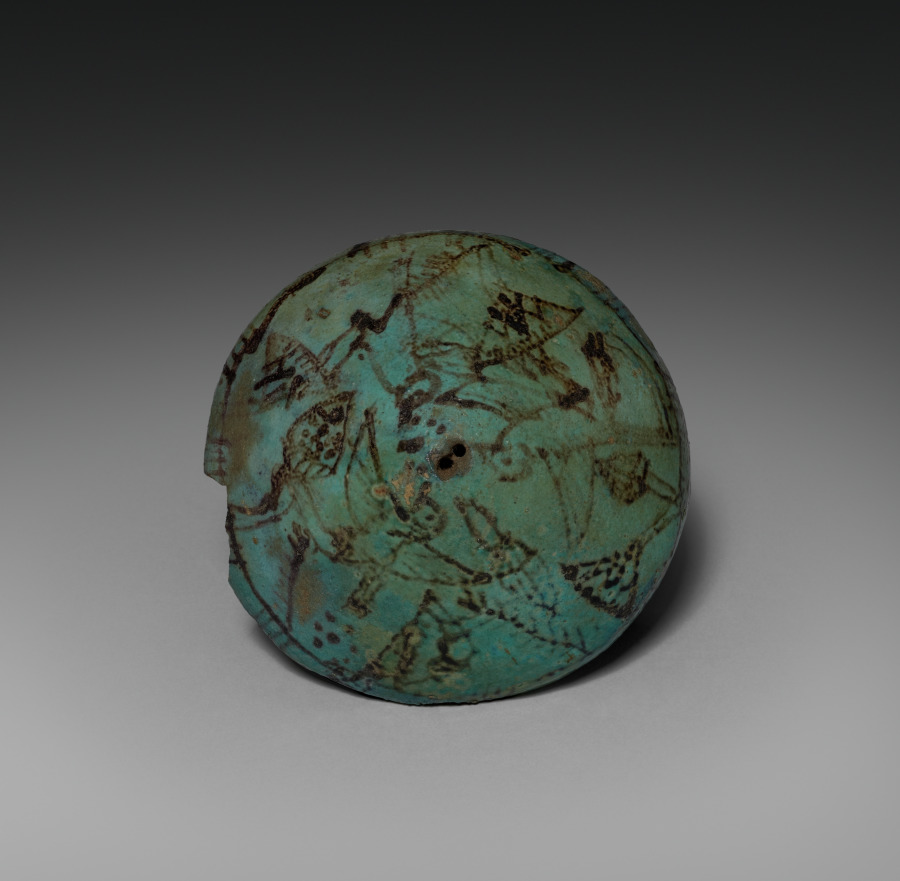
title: Pyxis with Lid (lid)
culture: Egypt, Middle Kingdom (2040–1648 BCE)–New Kingdom (1540–1069 BCE)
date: c. 1901–1525 BCE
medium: turquoise faience with black decoration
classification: Vessels